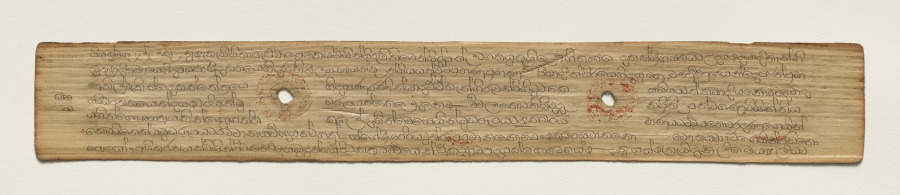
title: Leaf from a Buddhist Manuscript (recto)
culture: Sri Lanka, Singhalese, Late 17th century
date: c. 1700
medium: fiber paper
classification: Manuscript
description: Palm leaf material is still used for manuscripts in Sri Lanka. The palm leaves are prepared first by boiling them, drying them in the sun, and then rubbing them with oils. Scribes then use a metal stylus to incise the text. Then charcoal powder is wiped across the pages, filling in only the inscribed lines.